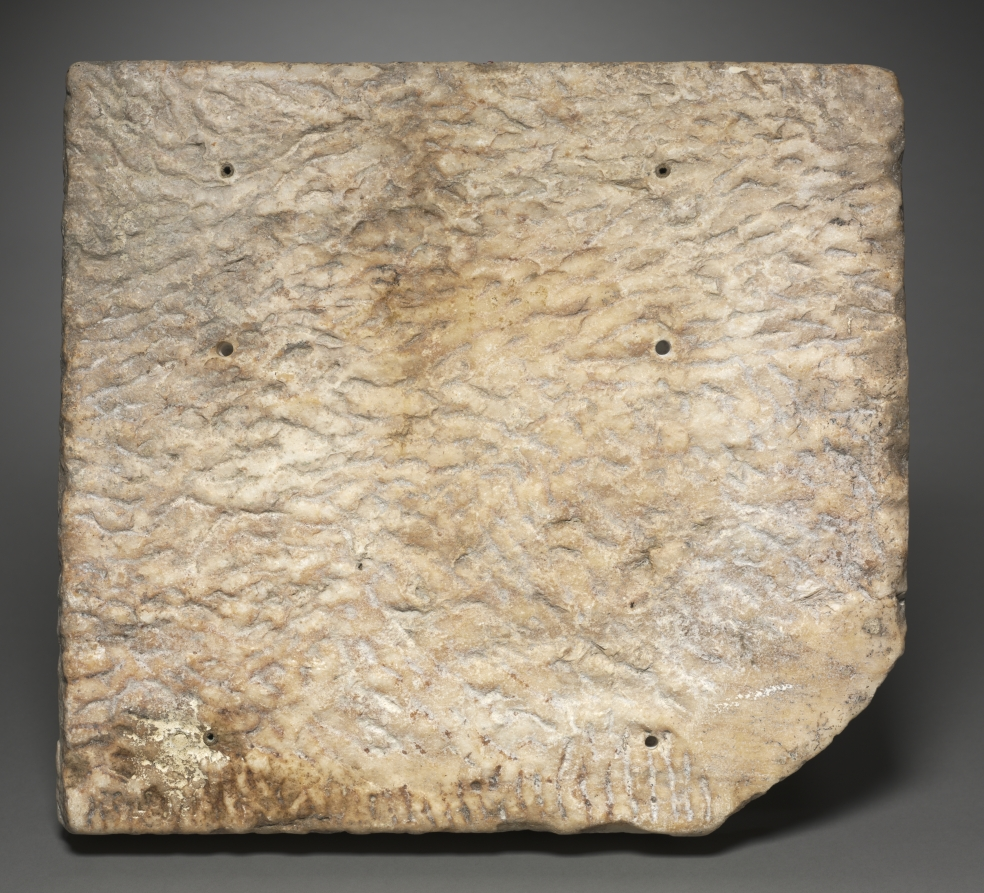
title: Relief of Apollo with Nike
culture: Italy, Roman, Augustan period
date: 27 BCE–14 CE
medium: Greek marble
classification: Sculpture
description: This is a typical example of Neo-Attic work, a school that revived the Archaic style of the late sixth century BC. The elongated figures and mannered gestures are typical of this school.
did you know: Between the figures is a draped egg-shaped stone known as an omphalos, the metaphorical center of the world.